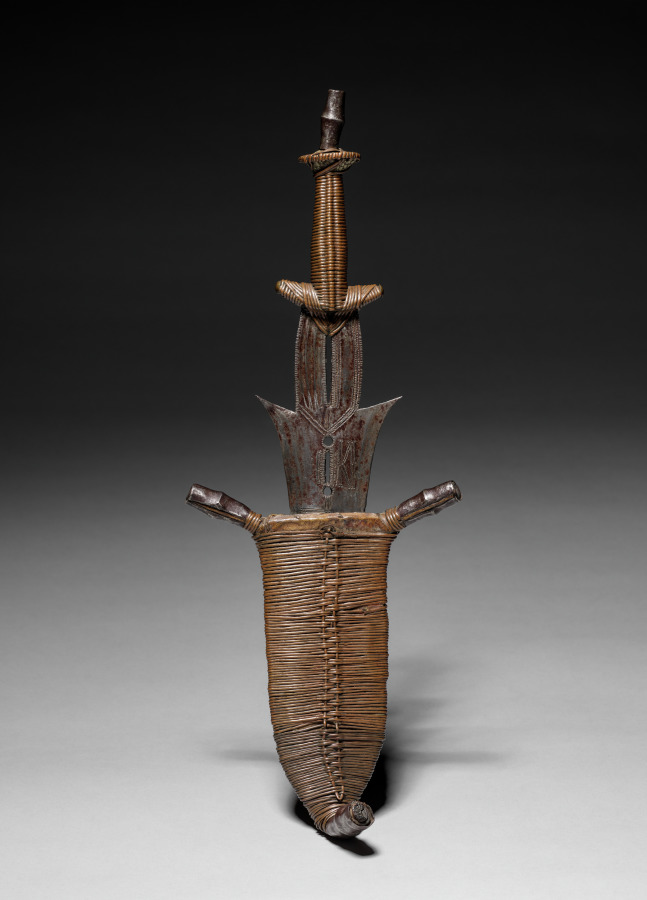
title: Knife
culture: Africa, Central Africa, Democratic Republic of the Congo, Ngbandi-style maker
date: c. 1900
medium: Iron, copper alloy, and rawhide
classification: Arms and Armor